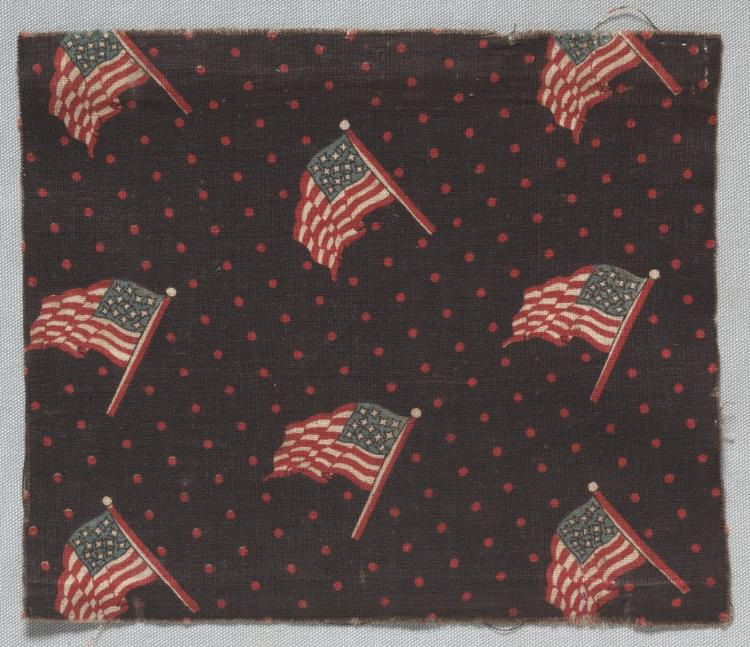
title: Textile Fragment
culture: America, early 19th century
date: early 19th century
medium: printed cotton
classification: Textile